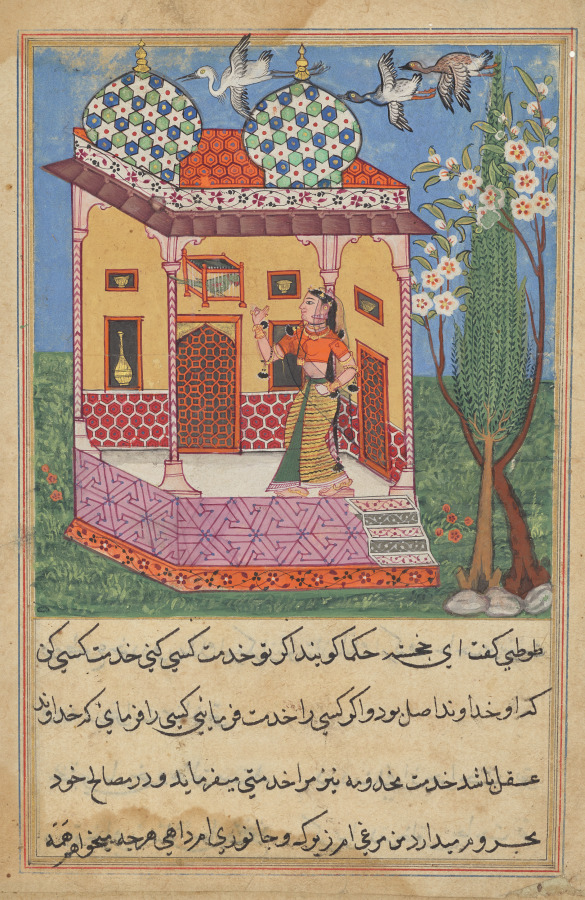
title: The Parrot Addresses Khujasta at the Beginning of the Twenty-sixth Night, from a Tuti-nama (Tales of a Parrot)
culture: Mughal India, court of Akbar (reigned 1556–1605)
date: c. 1560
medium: gum tempera, ink, and gold on paper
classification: Painting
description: When the sun, like a saffron-hued frog, plunged into the pond in the west and the moon, like a fish, came out of its snare in the east, Khujasta adorned with many kinds of jewels and bedecked with a variety of gold and silver ornaments went to Tuti to ask permission to leave. The parrot’s cage seems to hover in midair in the porch of a domed pavilion. The flowering treeentwining the cypress alludes to Khujasta’s desire to embrace her lover. As waterfowl course through the air, the parrot begins his story about the frog king Shapur.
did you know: The flowering tree entwining the cypress alludes to Khujasta’s desire to embrace her lover.